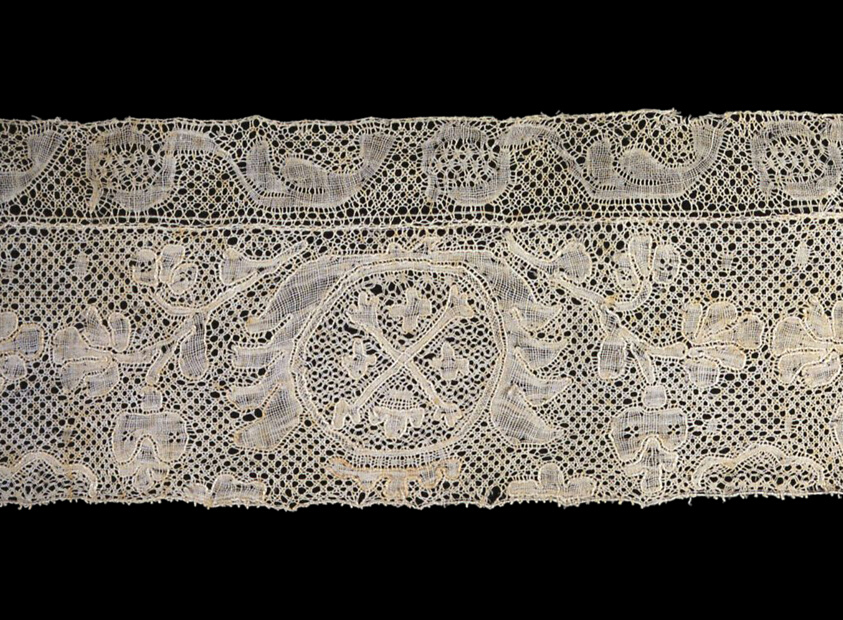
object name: Textile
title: Border (Fragment)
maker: Belgium, Flanders, Antwerp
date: 1725/1800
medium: Cotton and linen, bobbin straight lace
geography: Flanders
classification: textile; lace - bobbin; lace